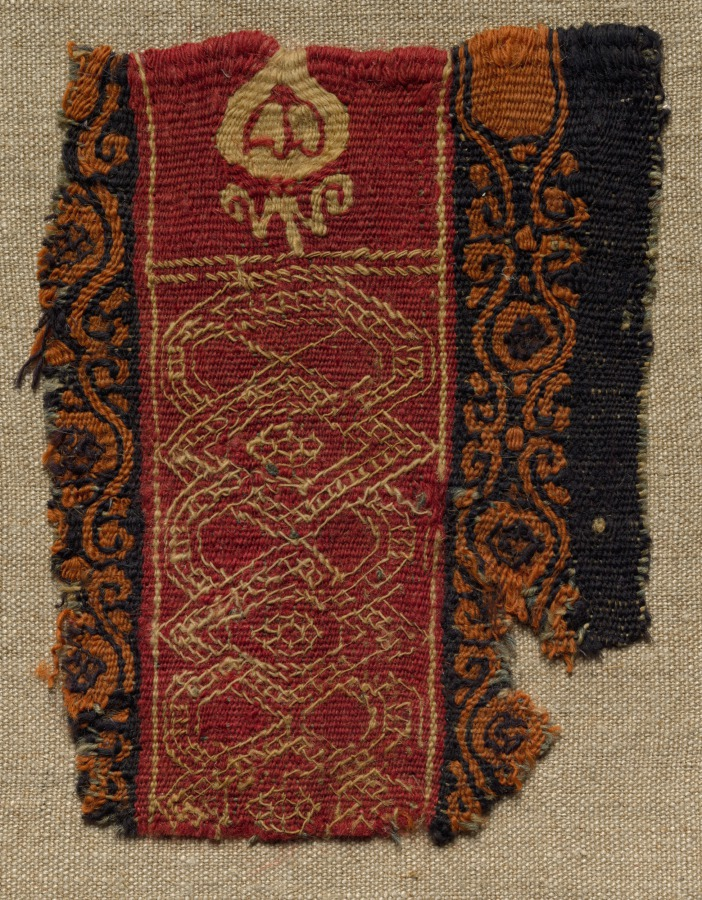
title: Fragment, with Part of a Clavus, from a Tunic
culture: Egypt, Byzantine period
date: 300s–600s CE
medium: tabby ground, inwoven tapestry ornament; wool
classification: Textile